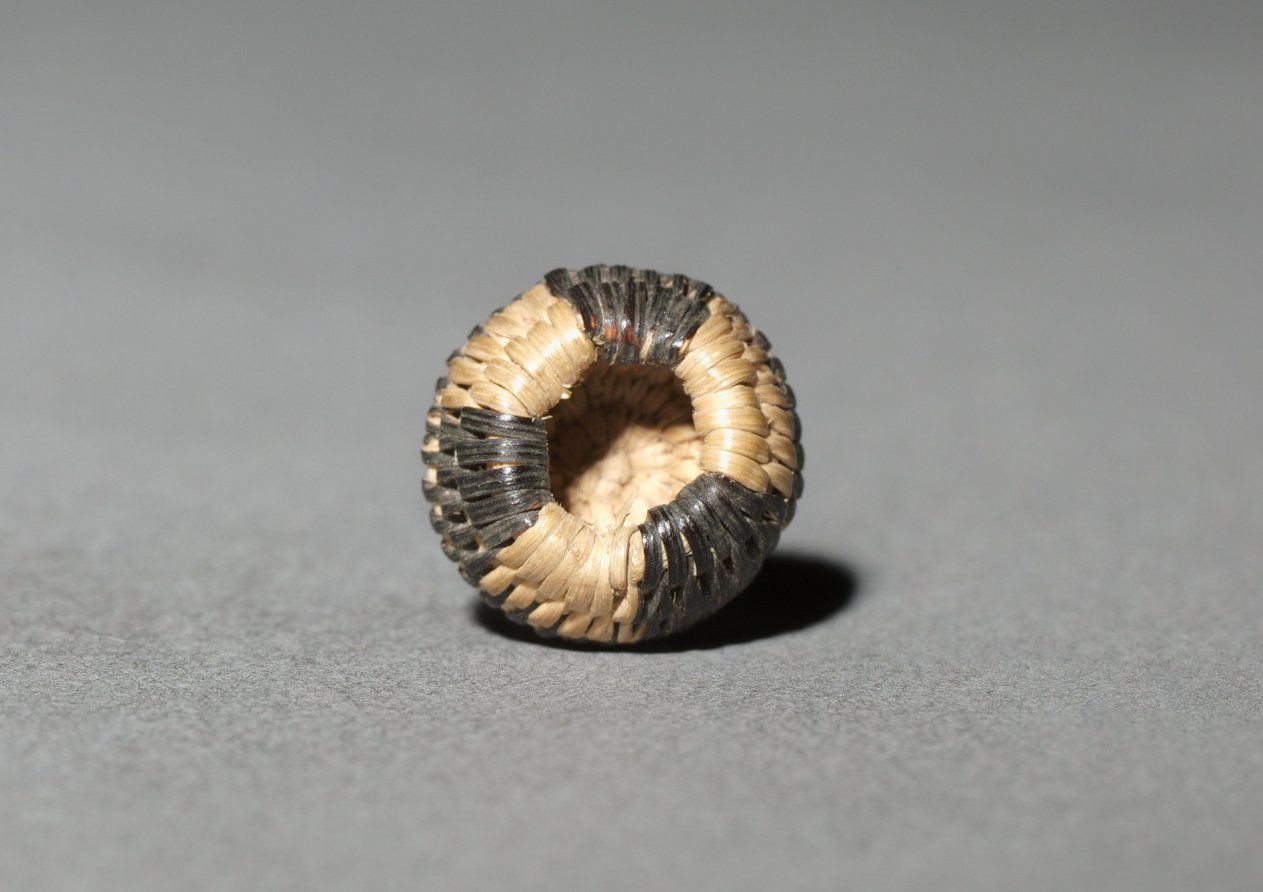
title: Miniature Basket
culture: America, Native North American, Southwest, Arizona, Akimel O'odham (Pima), Unassigned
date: before 1923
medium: plant fiber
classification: Basketry